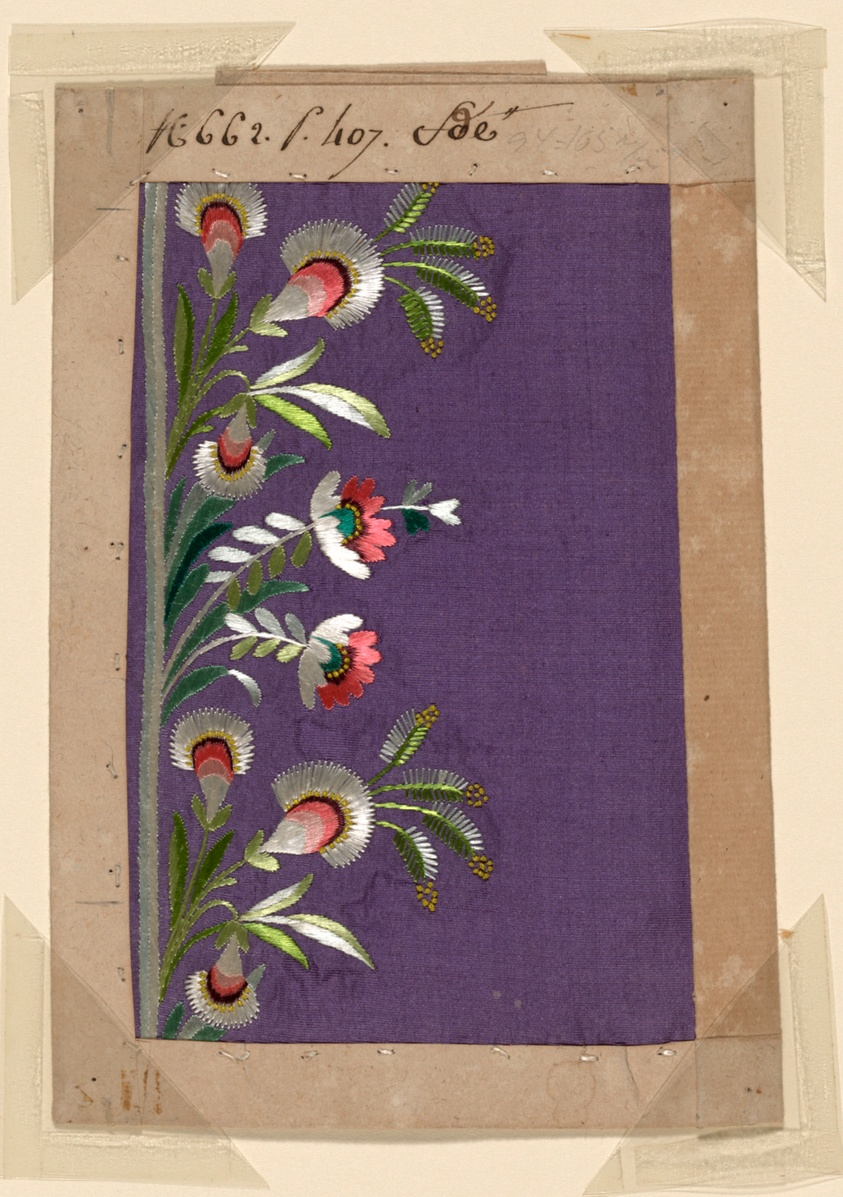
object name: Textile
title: Salesman's Sample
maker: Probably France, Lyon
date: 1780-1810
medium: Silk, warp-faced plain weave; embroidered with silk floss in satin stitch; French knots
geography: France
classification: textile; needlework (visual works); costume; costume - embroidery; embroidery; needlework - costume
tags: flowers, floral motifs